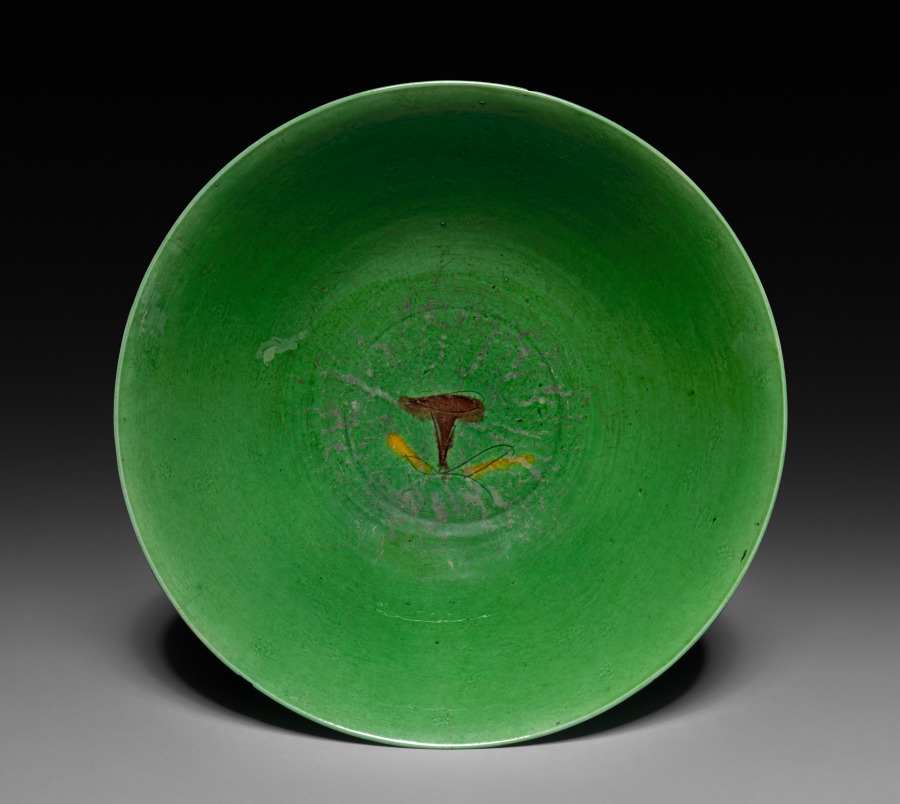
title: Bowl with Sprays of Flowers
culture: China, Jiangxi province, Jingdezhen kilns, Qing dynasty (1644-1911), Kangxi reign (1662-1722)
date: 1662–1722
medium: porcelain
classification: Ceramic